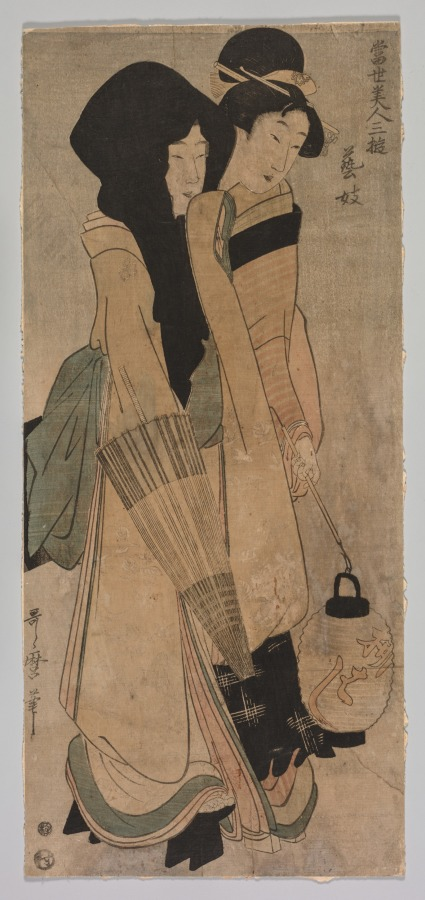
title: Contemporary Beauties Third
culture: Japan, Edo period (1615–1868)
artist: Kitagawa Utamaro (Japanese, c. 1754–1806)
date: 1753–1806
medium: color woodblock print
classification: Print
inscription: Signature: Utamaro fude Publisher Seal: Murataya Jihe